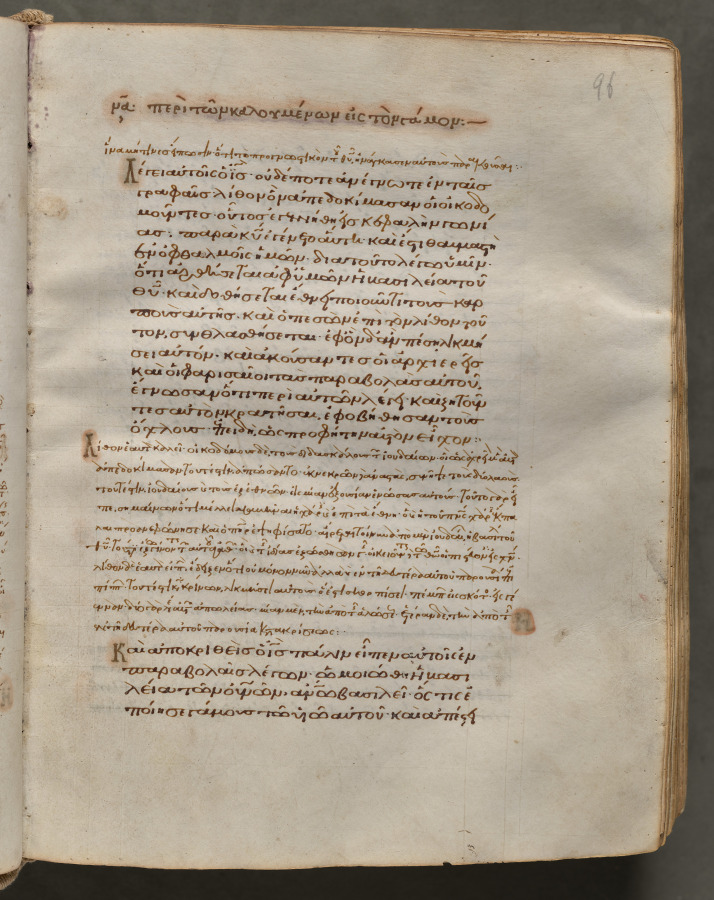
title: Text, folio 96 (recto), from a Gospel Book with Commentaries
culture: Byzantium, Constantinople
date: c. 1000–1100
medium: ink, tempera, and gold on vellum; leather binding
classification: Bound Volume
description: Each of the four gospels in this book opens on a page with brilliantly illuminated borders depicting the author of the text as well as birds-principally peacocks, symbols of the immortality of the soul-and fountains, representing the fountain of life and the salvation of the soul. This volume consists of 428 leaves with texts in Greek. Its level of sophistication suggests that it was probably written and decorated in a monastery in Constantinople.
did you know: Gospel Books were carried in procession through Byzantine churches.